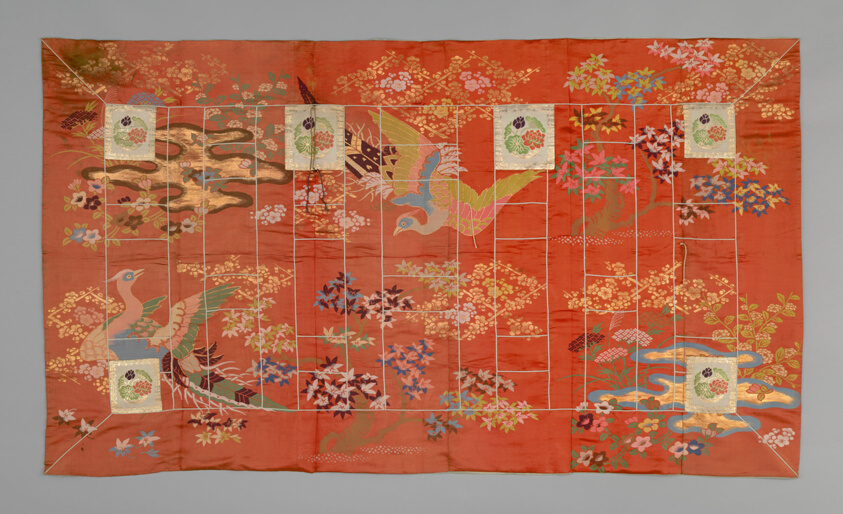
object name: Textile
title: Kesa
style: edo (japanese period)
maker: Japan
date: Meiji period (1868–1912), late 19th century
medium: Silk and gold-leaf-over-lacquered-paper strips, warp-float faced 2:1 'Z' twill weave with supplementary brocading wefts bound in twill interlacings; patches: silk and gold-leaf-over-lacquered-paper strips, warp-float faced 2:1 'Z' twill weave with 1:2 'Z' twill interlacings of secondary binding warps and supplementary patterning wefts; cords: silk and cotton, silk wrapped cloth; lined with silk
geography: Japan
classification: textile; weaving; liturgical - buddhist; costume